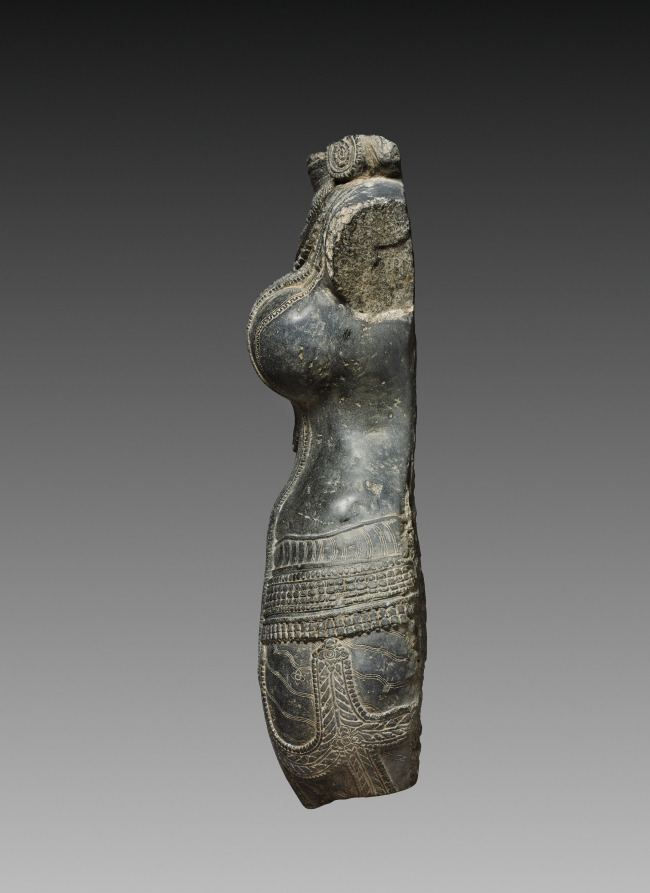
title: Female torso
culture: Northeastern India, Pala dynasty (730-1197)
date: 1000s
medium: black chlorite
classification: Sculpture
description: This life-size sculpture of a female figure was likely installed by a doorway or in an exterior niche of a Buddhist temple. Throughout the history of Indian art, voluptuous female figures have adorned Buddhist sanctuaries. Embodying the Indian ideal of female beauty, the form of the young mother with full breasts of milk personifies abundance, nourishment, and productivity—ideas that were considered auspicious and life affirming. Her copious jewels and valuable textiles also visually relate that the good karmic actions of venerating the Buddha and following his teachings will result in abundant good fortune.